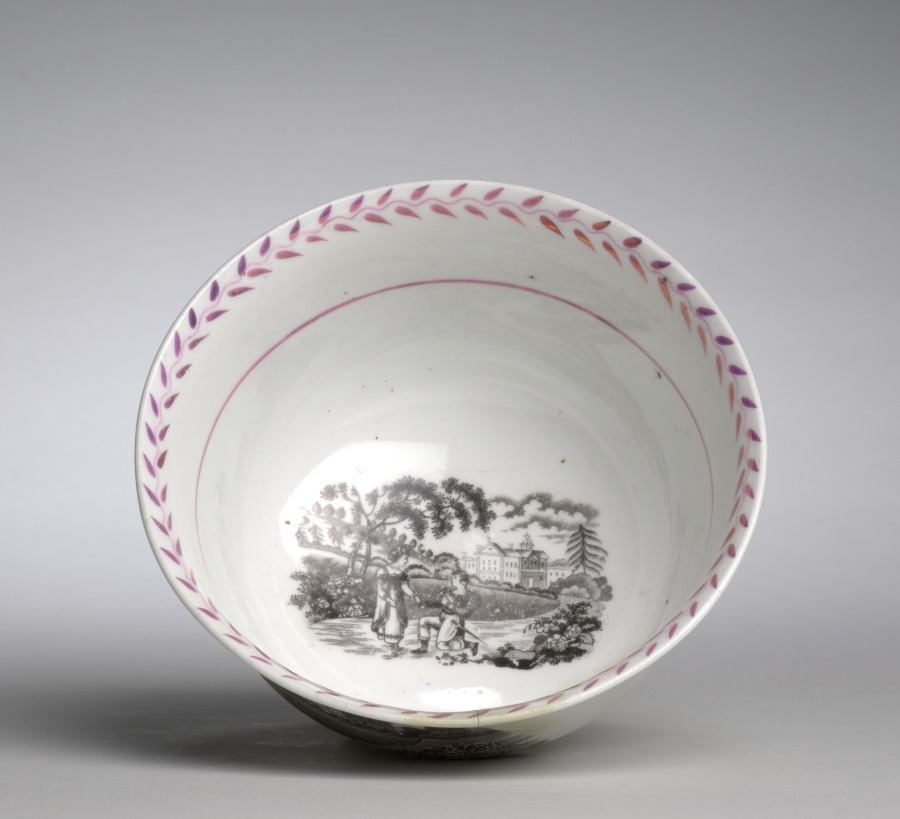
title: Waste Bowl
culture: England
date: c. 1800–1825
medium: earthenware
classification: Ceramic